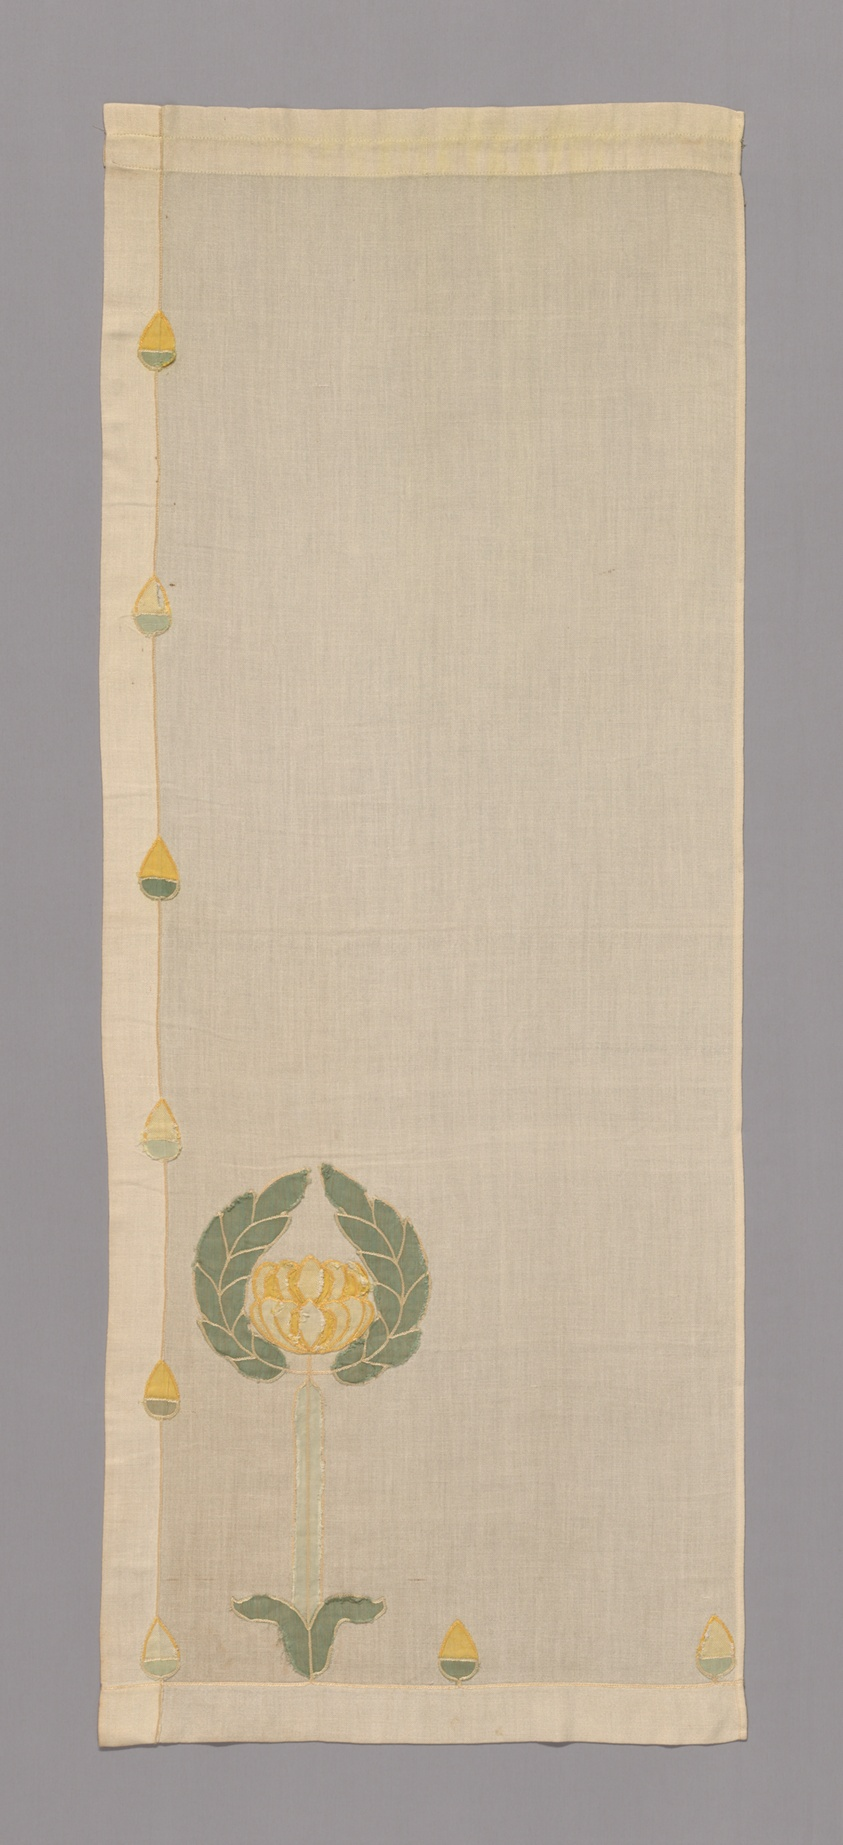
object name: Textile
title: Curtain Panel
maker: Designed by John Scott Bradstreet (American, 1845–1914); United States, Minnesota, Duluth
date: 1905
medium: Cotton, plain weave; appliqued with linen, plain weave; machine embroidered with silk yarn and cotton thread in looped stitch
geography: Minnesota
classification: textile; needlework (visual works)